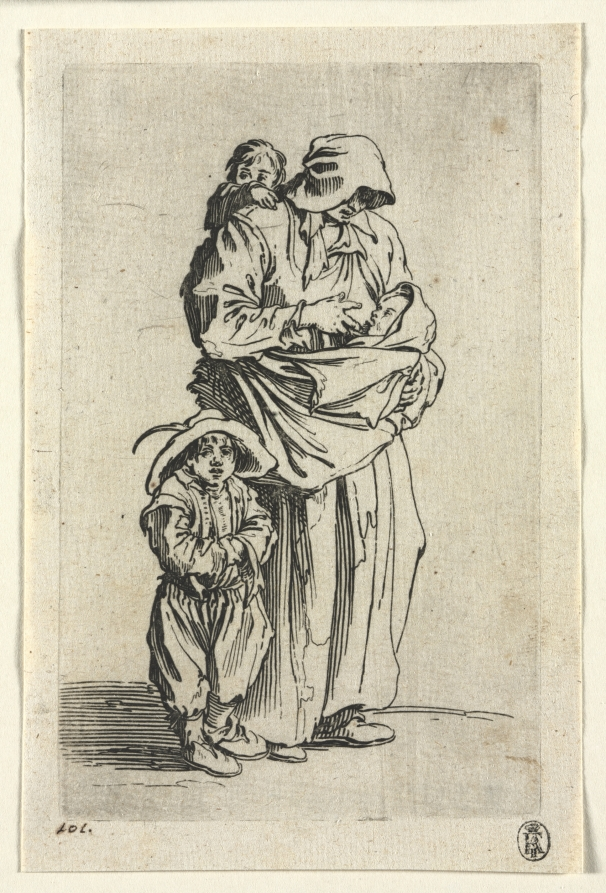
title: The Beggars: A Mother and Her Three Children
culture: France, 17th century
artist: Jacques Callot (French, 1592–1635)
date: c. 1623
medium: etchings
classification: Print